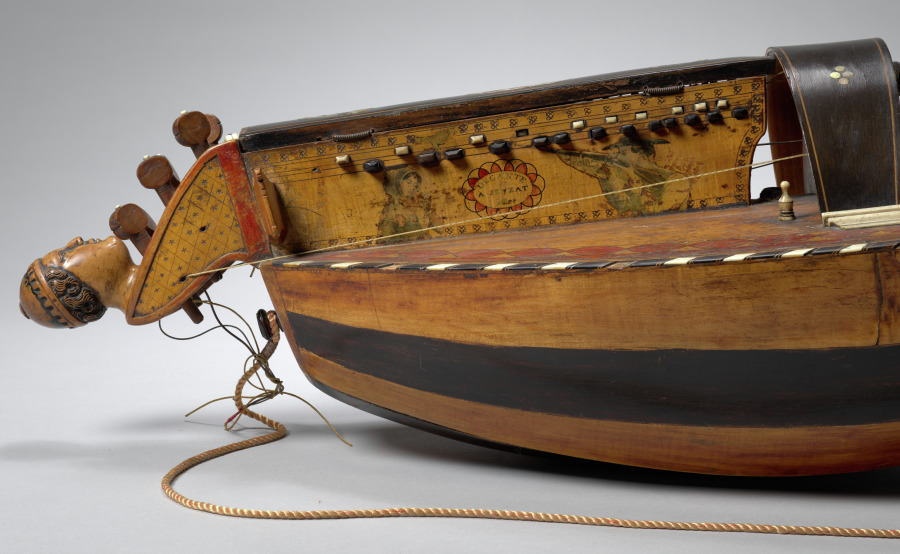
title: Vielle à Roue (Hurdy-Gurdy)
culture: France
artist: Jacques Decante (French, 1808–1884)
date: 1865–70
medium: Wood; mother-of-pearl inlay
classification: Musical Instrument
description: In France, the hurdy-gurdy is known as the vielle à roue (wheel fiddle). This six-stringed musical instrument produces sound by a hand crank-turned wheel that rubs against the strings. The wheel functions much like a violin bow, and single notes sound similar to those of a violin. Melodies are played on a keyboard that presses small wedges against the strings to change their pitch.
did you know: This vielle à roue was made in the French village of Jenzat, which was the manufacturing center for hurdy-gurdies during the 19th century.